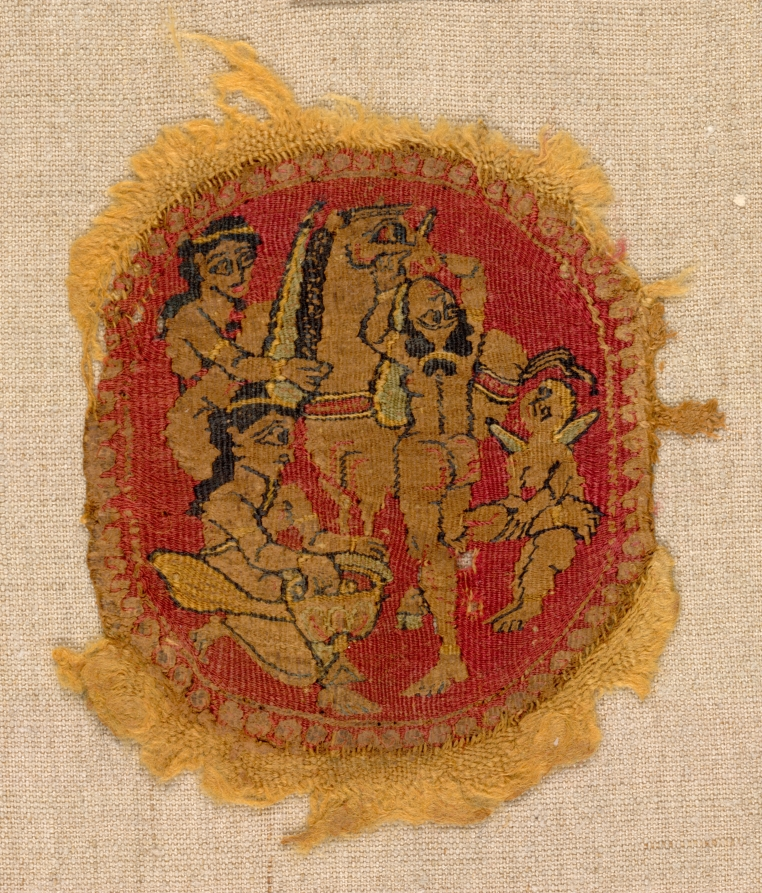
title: Five Round Segmenta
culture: Egypt, Umayyad period (661–750)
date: 650 – 750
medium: tapestry weave: wool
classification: Textile